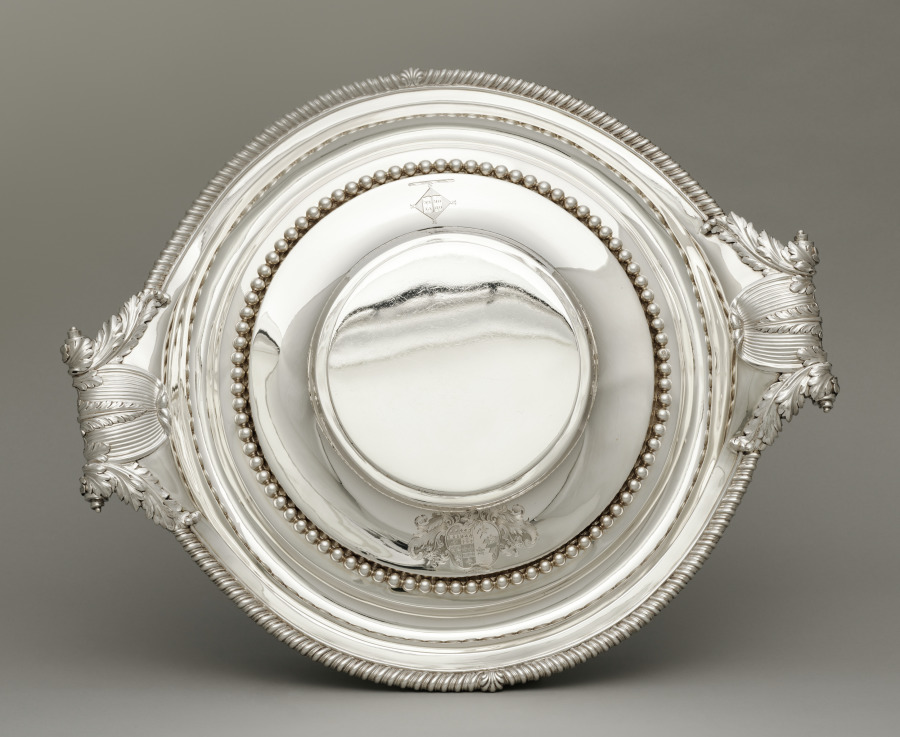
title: Stand for Covered Tureen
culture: England, London, 19th century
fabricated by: Paul Storr (British, 1771–1844)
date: 1812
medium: silver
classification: Silver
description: Silver fulfilled a prominent role in projecting wealth, status, power, and ritual in British life during the 1600s and 1700s. Elaborate forms such as this tureen stand, with its acanthus leaves and fluted detailing, not only represented wealth in its sheer silver weight but also provided royal and aristocratic owners a surface for displaying engraved coats of arms. The arms of the High Sheriff of Yorkshire, Timothy Hutton and his wife Elizabeth Chaytor of Spennithorne Hall in northern England are engraved on this stand by Paul Storr, one of the most prominent London silversmiths of the period.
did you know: This is a stand for a tureen. See cover record.